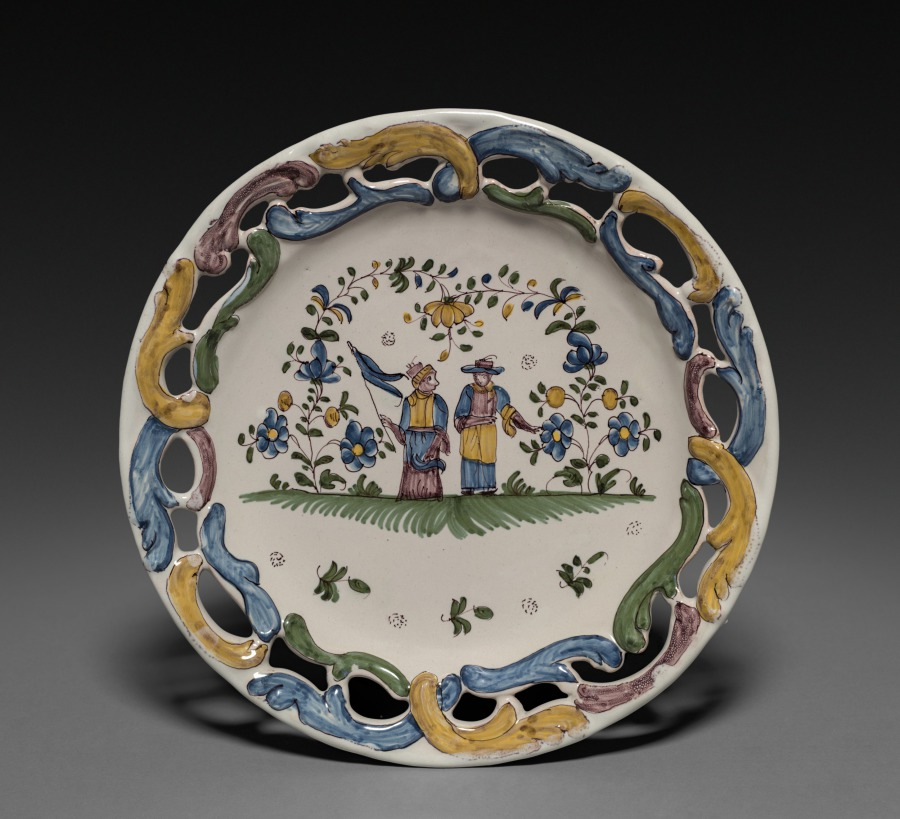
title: Plate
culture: France, Samadet, 18th century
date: c. 1770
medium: faience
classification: Ceramic